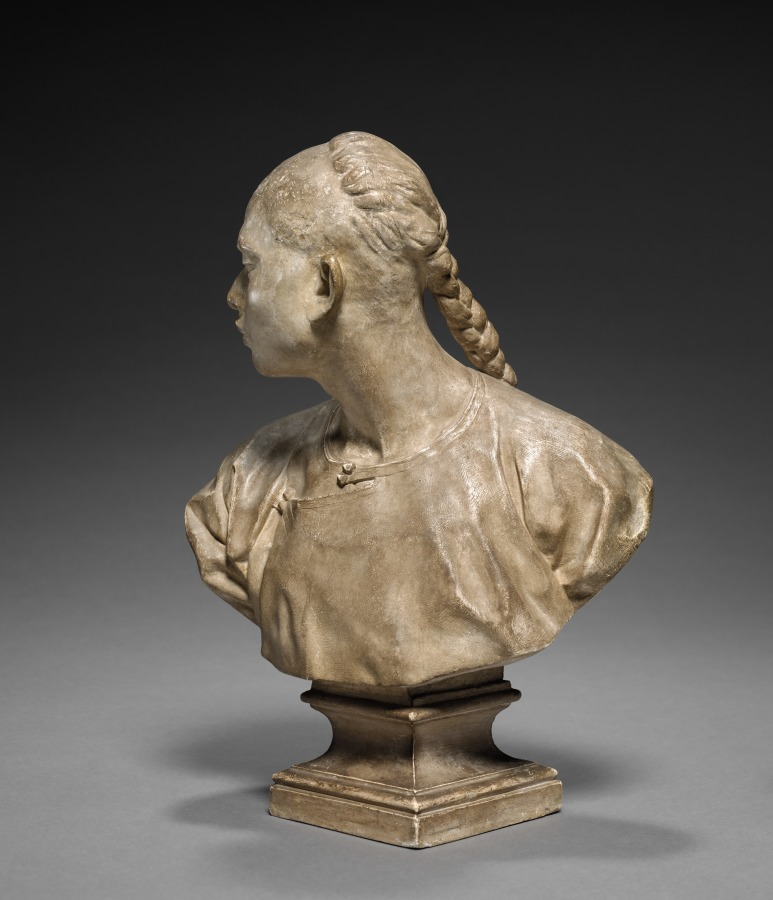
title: Bust of a Chinese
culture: France, 19th century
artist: Jean-Baptiste Carpeaux (French, 1827–1875)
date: 1867–68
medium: plaster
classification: Sculpture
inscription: inset into bust near base at rear is struck copper plate inscribed: "PROPRIETE CARPEAUX" with an eagle in the center.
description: This bust is related to the allegorical figure of Asia in Carpeaux's monumental bronze fountain, The Four Parts of the World Upholding the Celestial Sphere, commissioned by Baron Haussmann in 1867 for the Luxembourg Gardens in Paris. The figure was changed into a woman in the fountain and reflects the artist's interest in accurately portraying different ethnic groups. This bust exists in various sizes and media.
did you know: Greatly admired during his time, Jean-Baptiste Carpeaux received important commissions from French Emperor Napoleon III and Baron Georges-Eugène Haussmann.